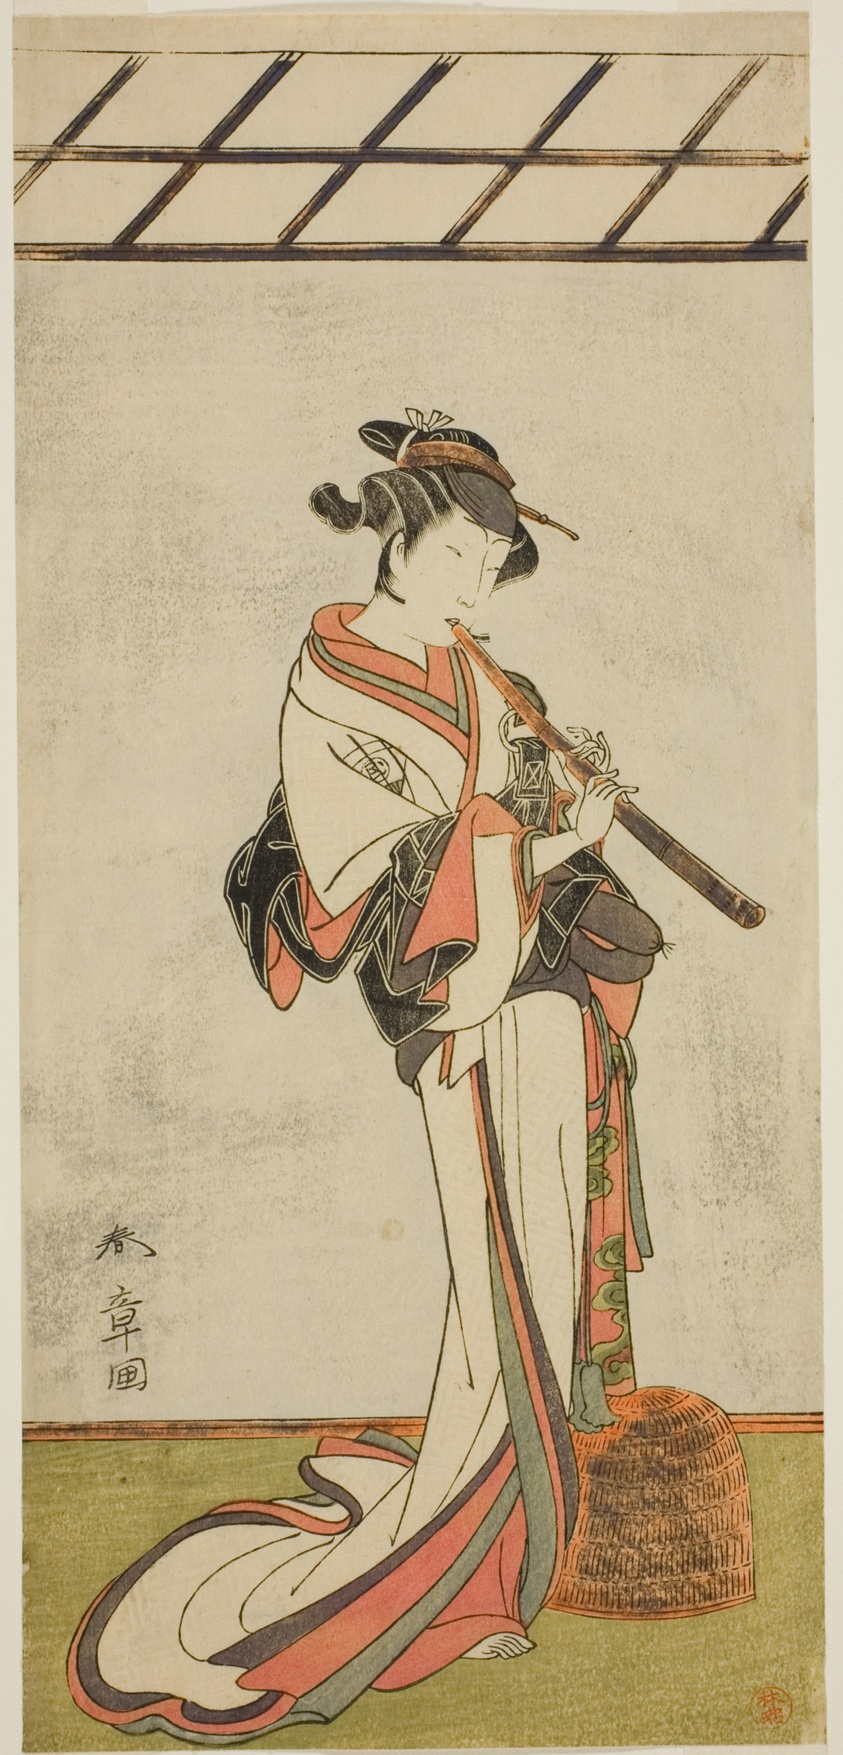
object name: Print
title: The Actor Onoe Tamizo I as Oiso no Tora or Kewaizaka no Shosho, Disguised as a Female Komusu (?), in the Play Yui Kanoko Date-zome Soga (?), Performed at the Ichimura Theater (?) in the First Month, 1774 (?)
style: Japanese (culture or style)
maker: Katsukawa Shunsho 勝川 春章; Japanese, 1726-1792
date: c. 1774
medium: Color woodblock print; hosoban; from a multisheet composition (?)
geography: Japan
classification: woodblock print; print; asian art